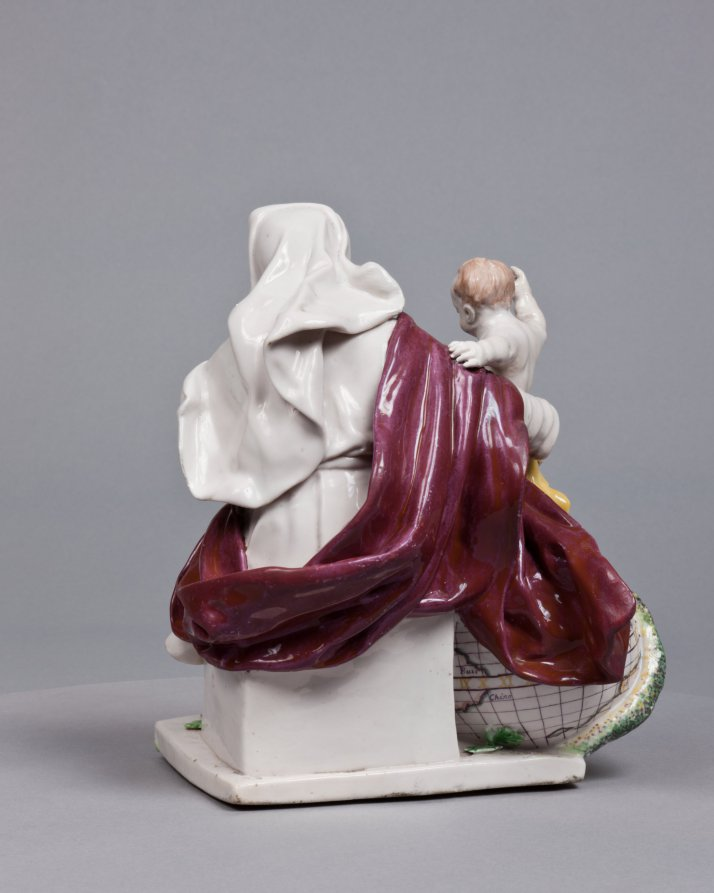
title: Madonna and Child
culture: England, Chelsea, 18th century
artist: Chelsea Porcelain Factory (Britain, London, 1745–84)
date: c. 1755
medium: porcelain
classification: Ceramic